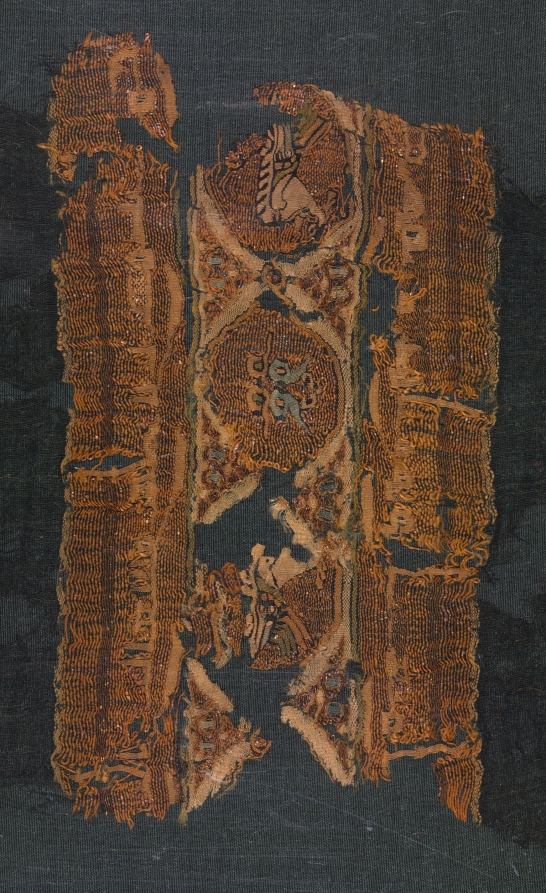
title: Tiraz with gold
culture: Egypt, Fatimid period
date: 1075–99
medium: plain weave with inwoven tapestry weave: linen, silk, and gold filé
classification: Textile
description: Gold thread forms the background of undecipherable texts and interlaced medallions in two tripartite bands woven with silk in slit-tapestry weave on a dark blue-green sharb linen ground. Sharb is a fine linen, which often formed the ground fabric for ṭirāz. Roosters, hens, and confronted chicks decorate the medallions.